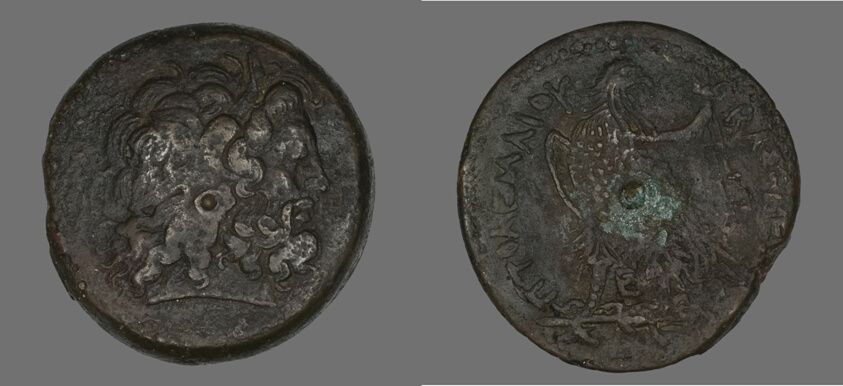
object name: Coin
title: Coin Depicting the God Zeus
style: ptolemaic, ancient, greek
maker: Greek, Ptolemaic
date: 222-204 BCE, issued by Ptolomy IV (?)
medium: Bronze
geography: Roman Empire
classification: coin; ancient art